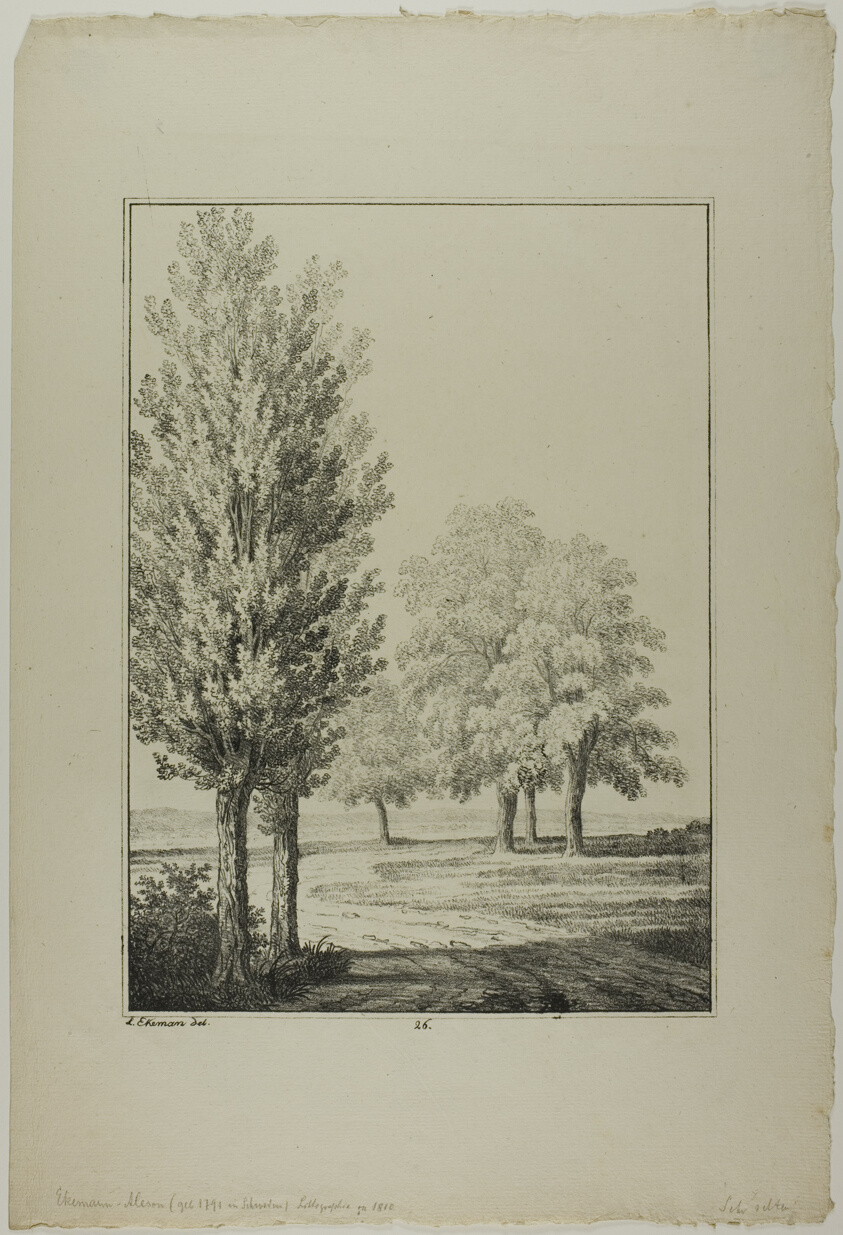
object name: Print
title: Plate 26 from Blatt Baum und Landschafts Studien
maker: Lorenz Ekemann Alesson (Swedish, 1791-1828)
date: c. 1810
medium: Lithograph on paper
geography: Sweden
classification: lithograph; print; prints and drawing